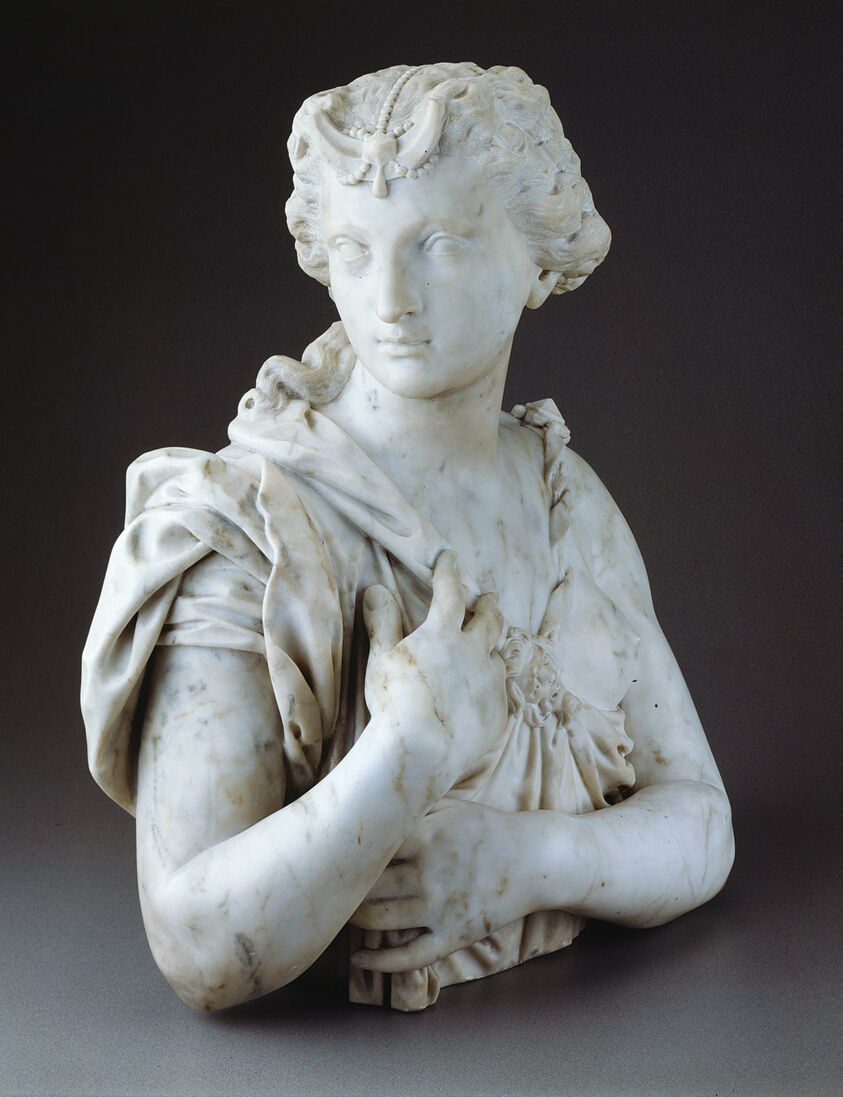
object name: Sculpture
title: Bust of Diana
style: 17th Century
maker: Giuseppe Mazza (Italian, 1653–1741)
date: c. 1692–93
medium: Marble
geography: Italy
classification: bust/head; sculpture; Italian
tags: diana, Greek mythology, Greek gods, busts, diety, goddesses, gods (deities), head, mythical, mythological figures, mythology, woman